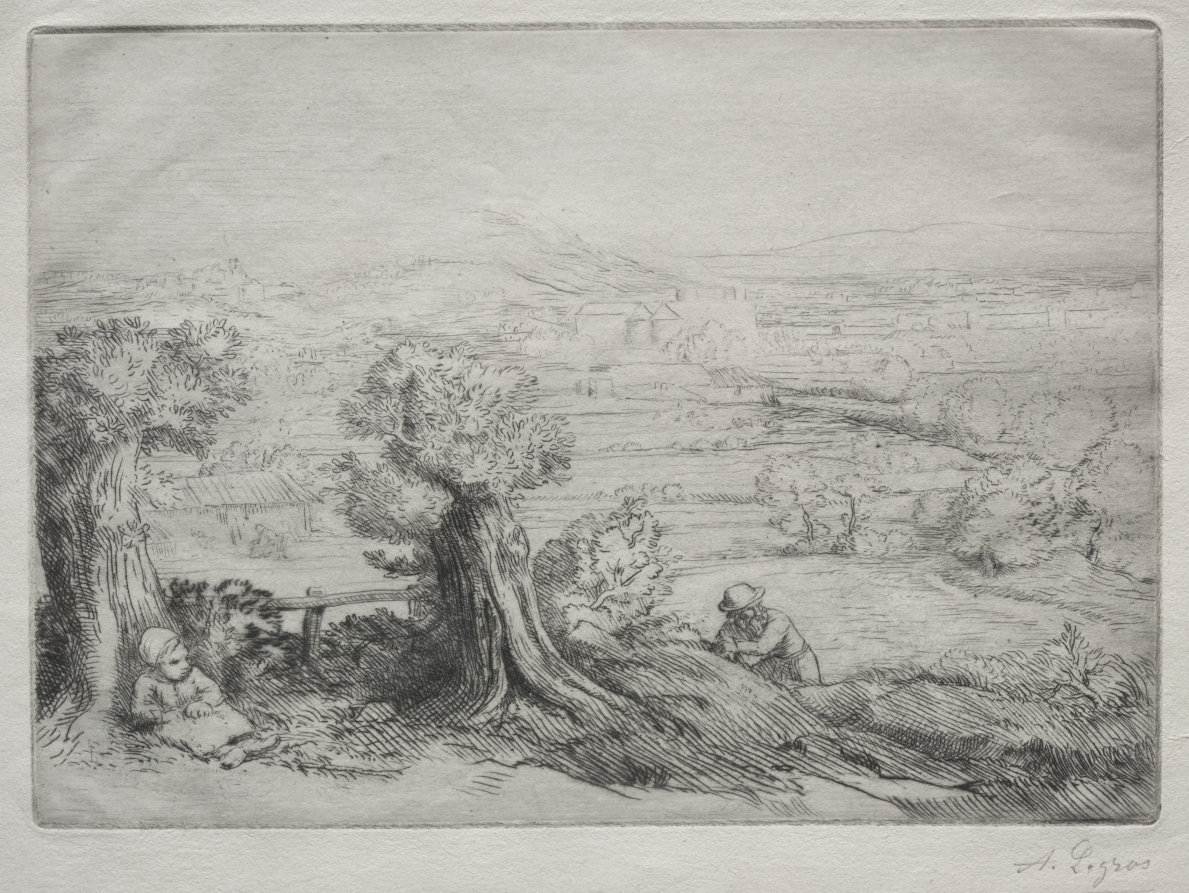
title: Souvenir d'un Vallée en Bourgogne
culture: France, 19th-20th century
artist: Alphonse Legros (French, 1837–1911)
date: c. 1857–1911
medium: etching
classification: Print